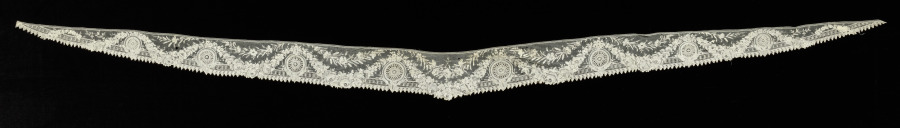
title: Lace Strip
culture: Belgium, Brussels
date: 1840–60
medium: Needle lace (point de gaze)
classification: Lace